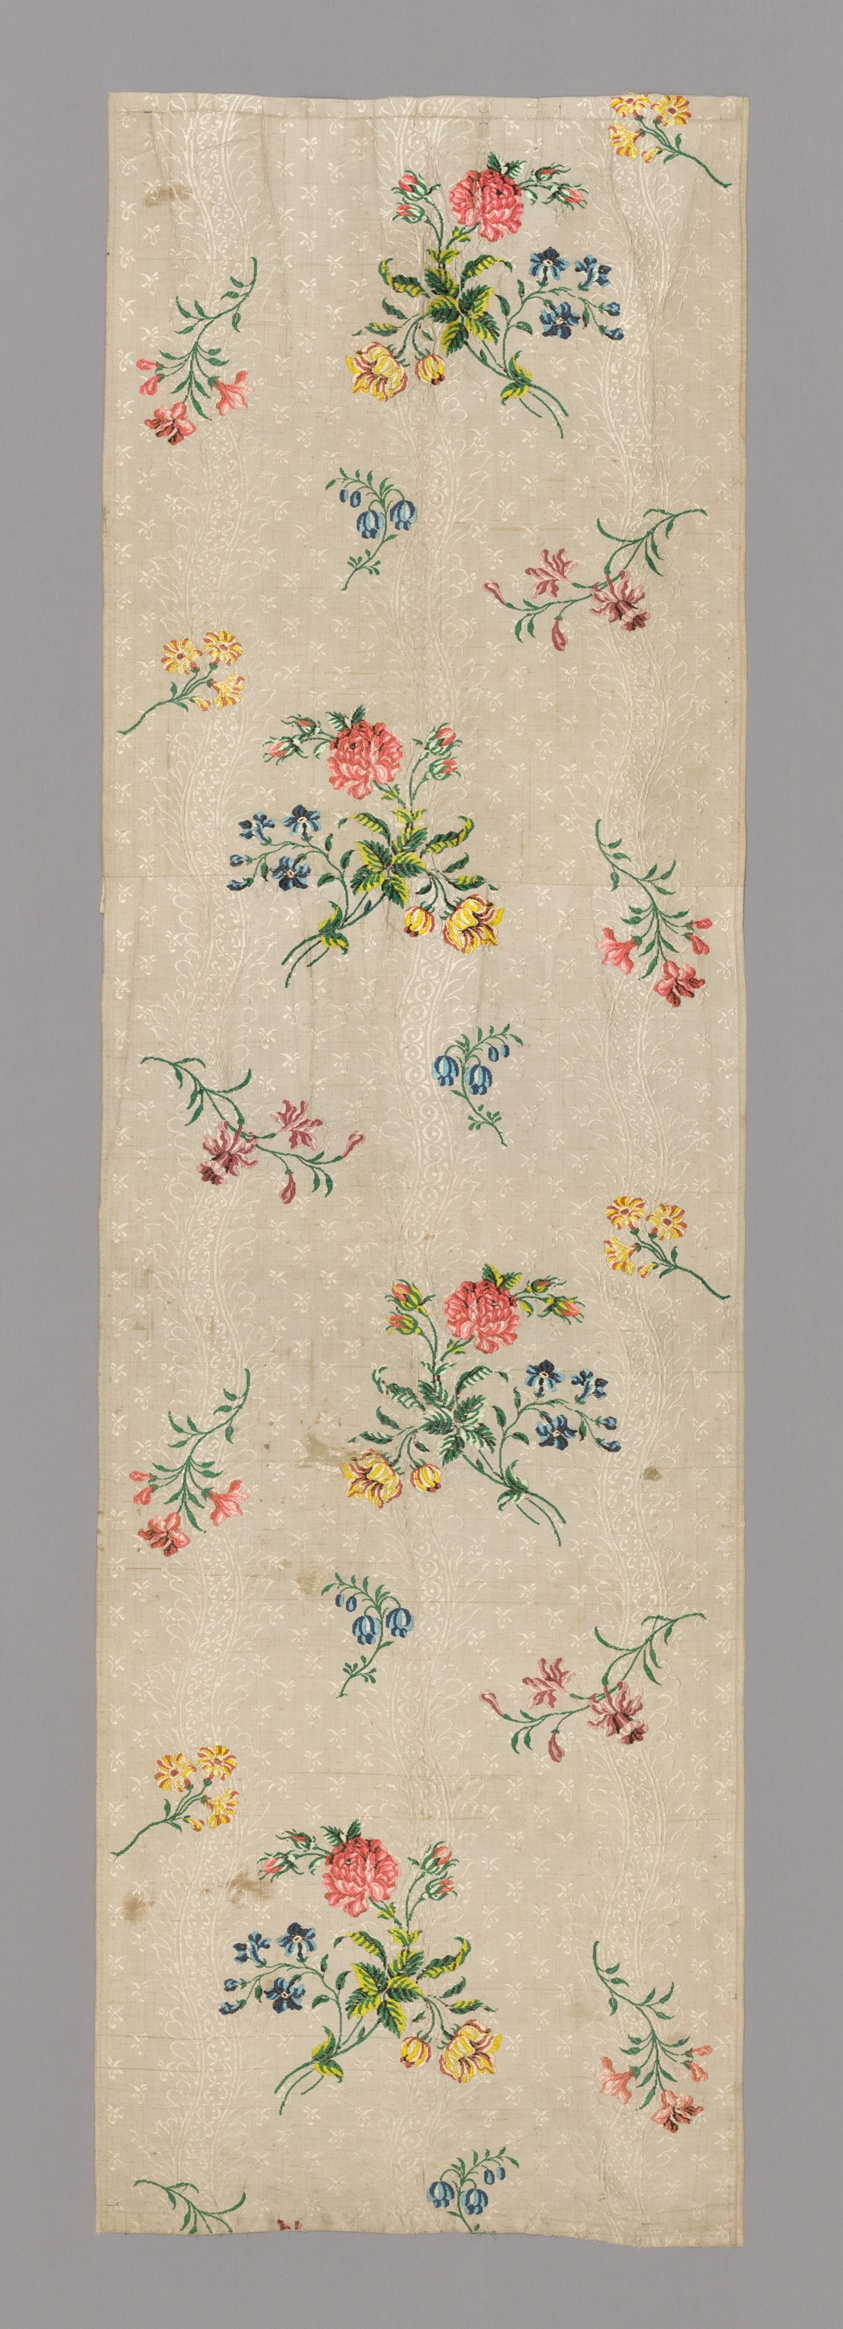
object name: Textile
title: Panel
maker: England, Spitalfields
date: c. 1747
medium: Silk, plain weave with supplementary brocading wefts and self-patterned by complementary ground weft floats; two panels joined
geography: England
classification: textile; weaving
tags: floral arrangements, garlands